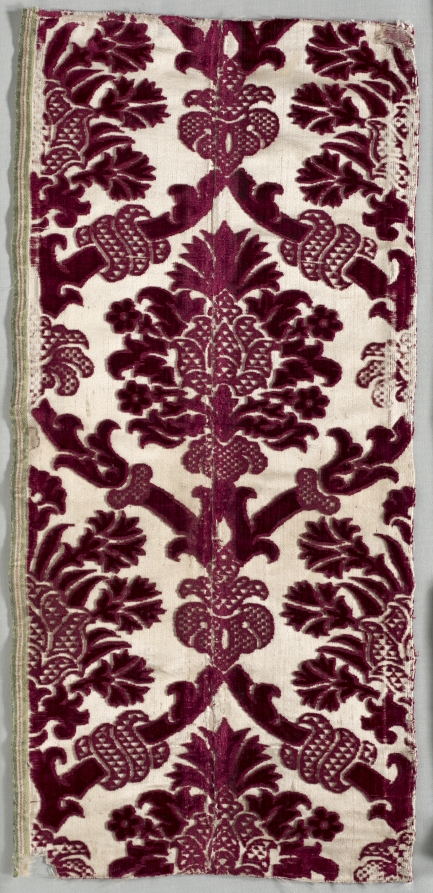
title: Velvet BrocadeTextile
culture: Italy, mid-16th century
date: mid 1500s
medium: velvet brocade, silk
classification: Velvet